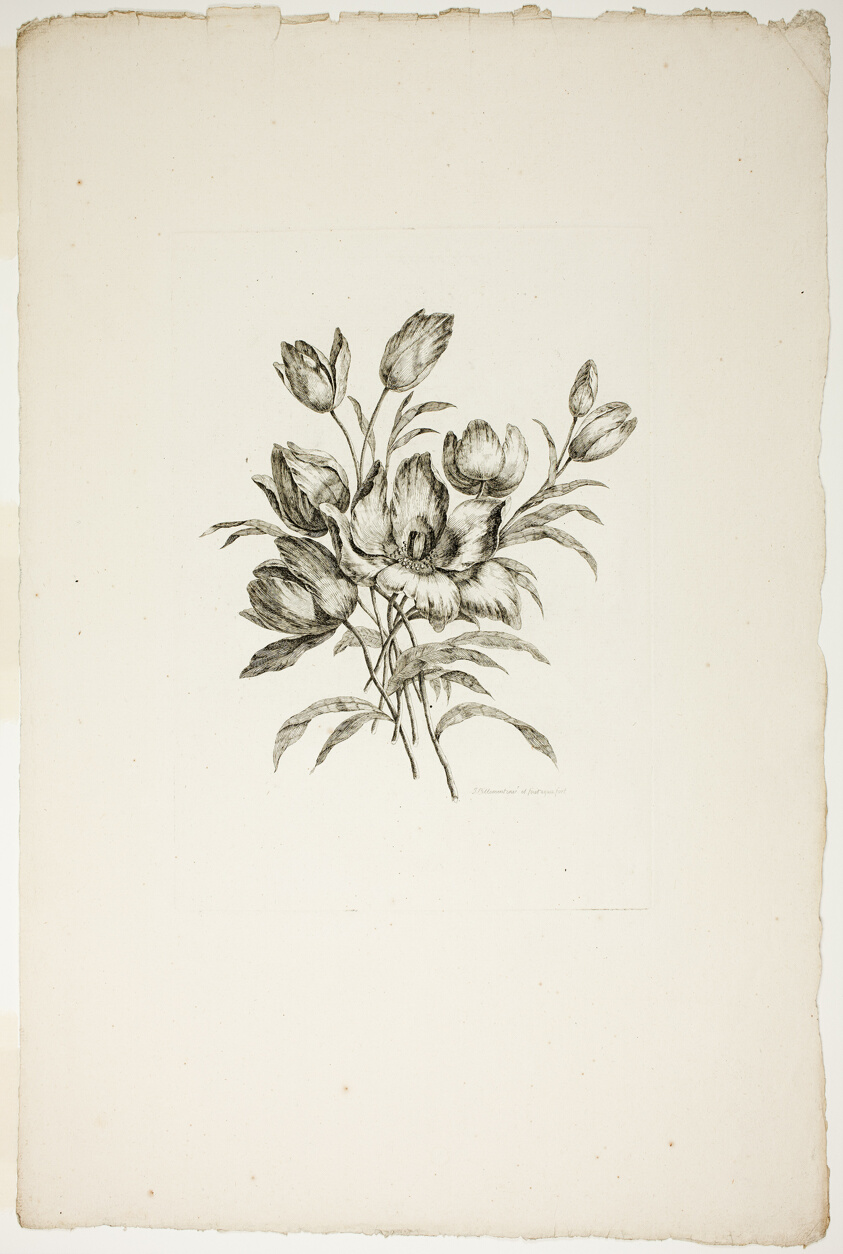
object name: Print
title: Bouquet with Tulips, from Collection of Different Bouquets of Flowers, Invented and Drawn by Jean Pillement and Engraved by P. C. Canot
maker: Pierre-Charles Canot (French, 1710-1777); after Jean-Baptiste Pillement (French, 1728-1808); published by Charles Leviez (French, 1708-1778)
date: published July 4, 1760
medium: Etching on ivory laid paper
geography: France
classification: etching; print; prints and drawing